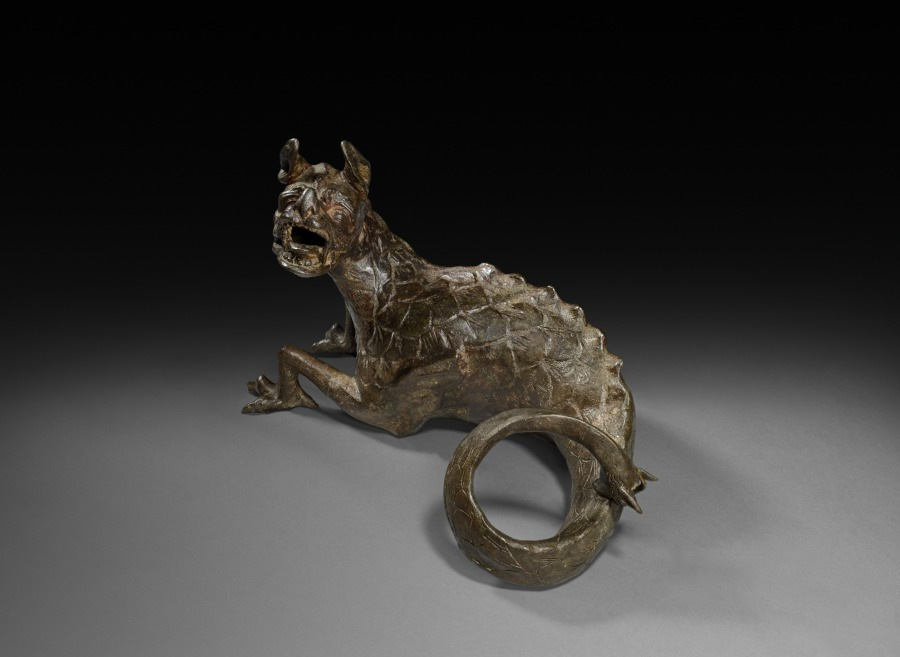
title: Dragon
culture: Italy, 18th century or later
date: 1700s or later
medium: bronze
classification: Sculpture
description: This figure was probably originally meant to serve as the decorative foundation to a larger object such as a casket or urn. In transition from decorative motif to independent work of art, the nether half may have been an addition, evidenced by the seam along its torso.